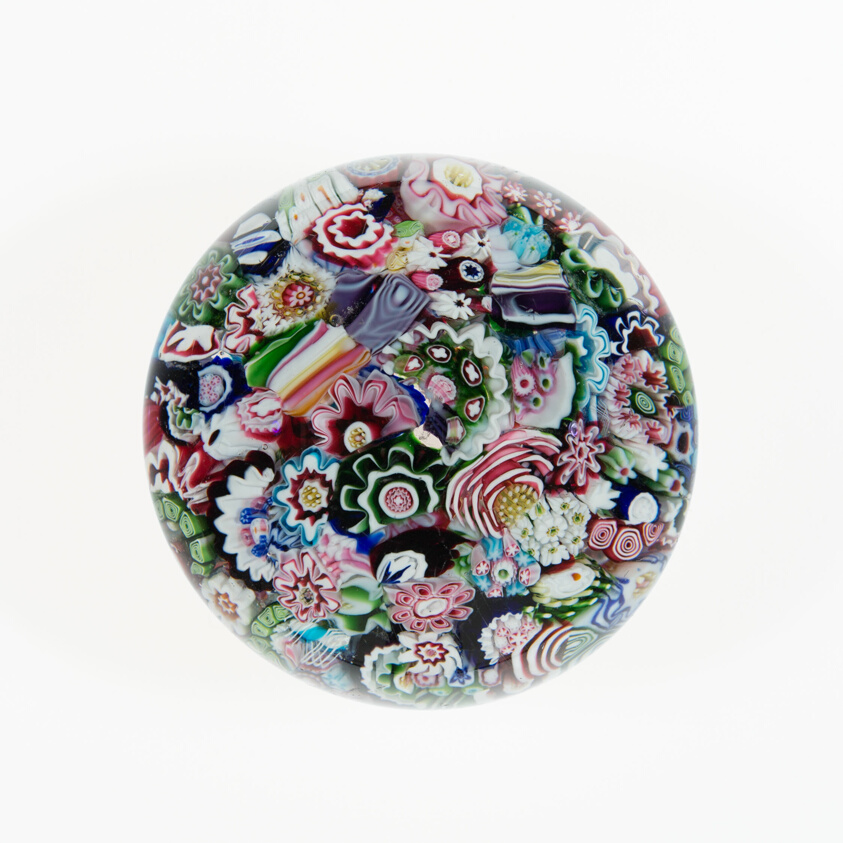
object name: Glass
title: Paperweight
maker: Clichy Glassworks (Cristalleries de Clichy); Clichy, France, 1837-1885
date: 1845/70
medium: Glass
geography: Clichy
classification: paperweight; lampwork; european decorative arts; glass